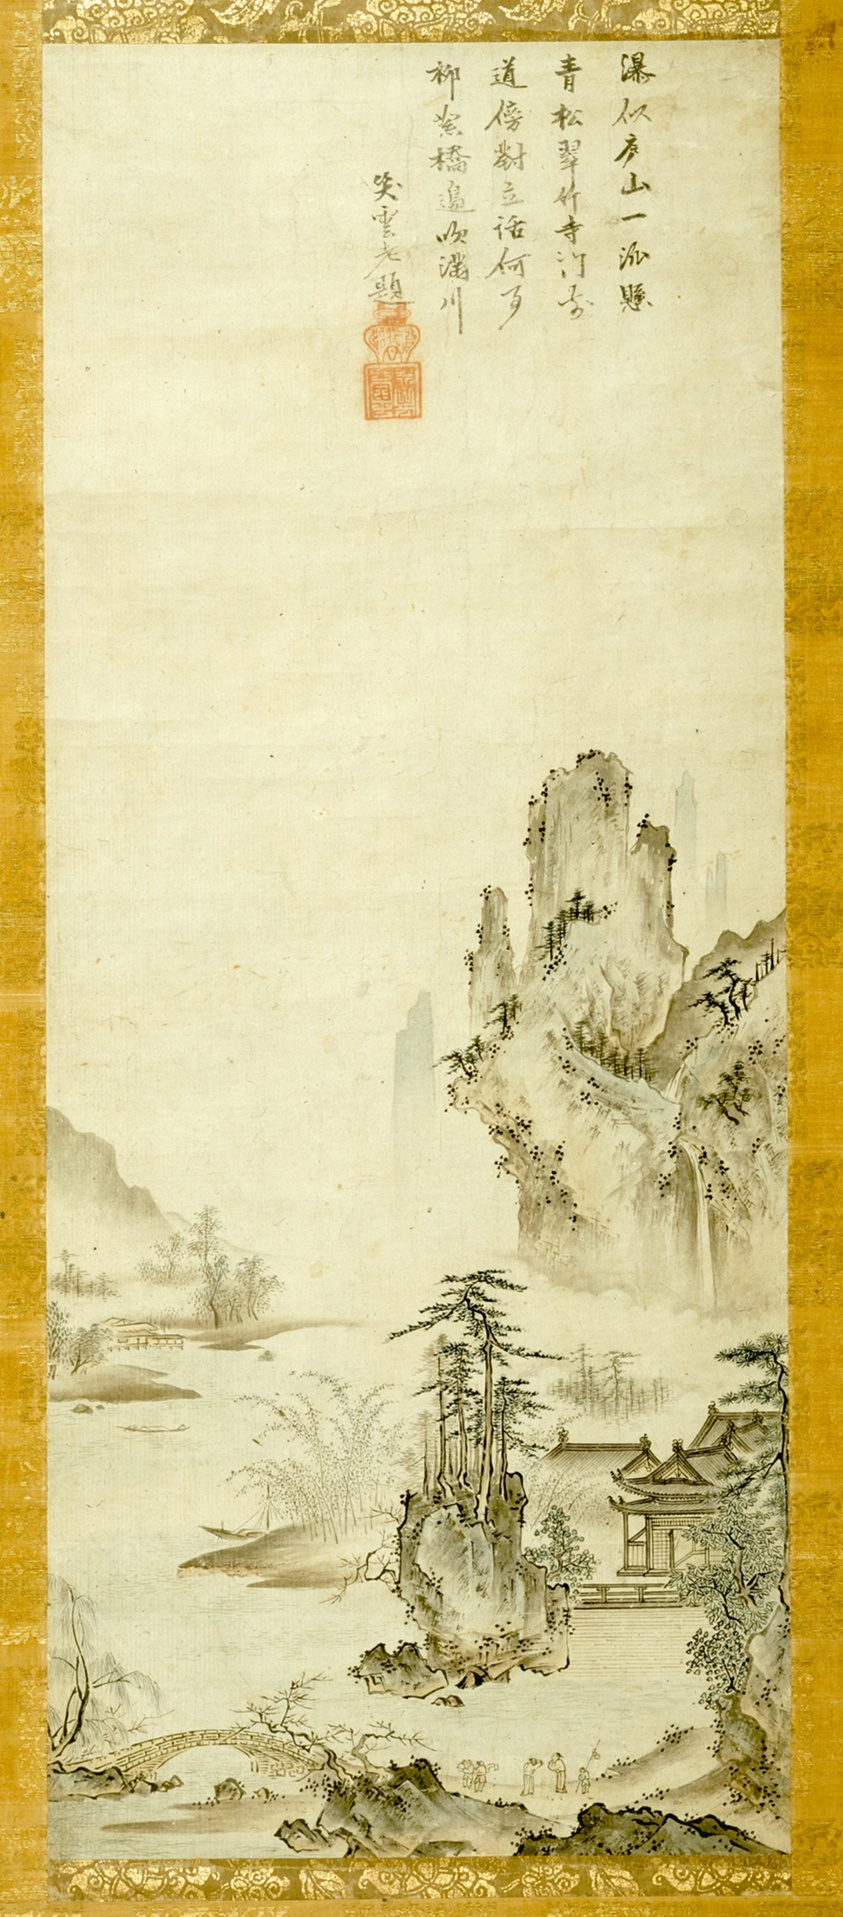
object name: Painting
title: Landscape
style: Japanese (culture or style)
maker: Attributed to Sotan; Japanese, 1413-1481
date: 15th century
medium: Ink and colors on paper, hanging scroll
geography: Japan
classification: hanging scroll; painting; asian art